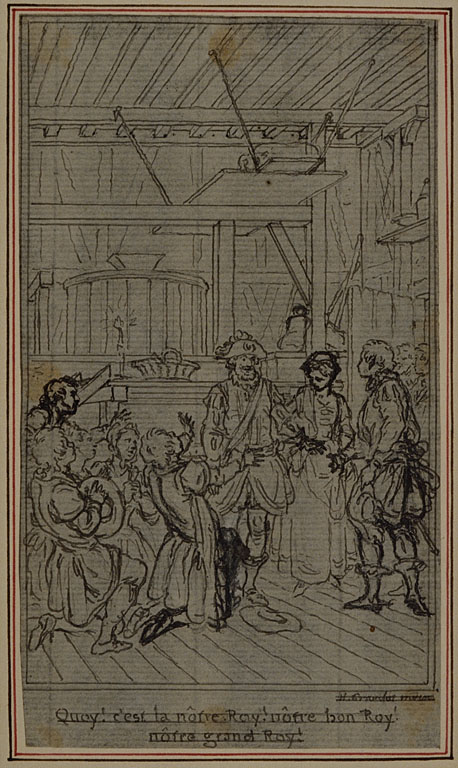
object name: Drawing and Watercolor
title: Study for Vignette-Frontispiece of Colle's "La Partie de Chasse de Henri IV", Act III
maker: Hubert François Gravelot (French, 1699-1773)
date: c. 1766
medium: Pen and black ink, with graphite, on gray laid paper, incised for transfer and perimeter mounted on cream laid paper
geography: France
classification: pen and ink drawings; drawings (visual works); prints and drawing